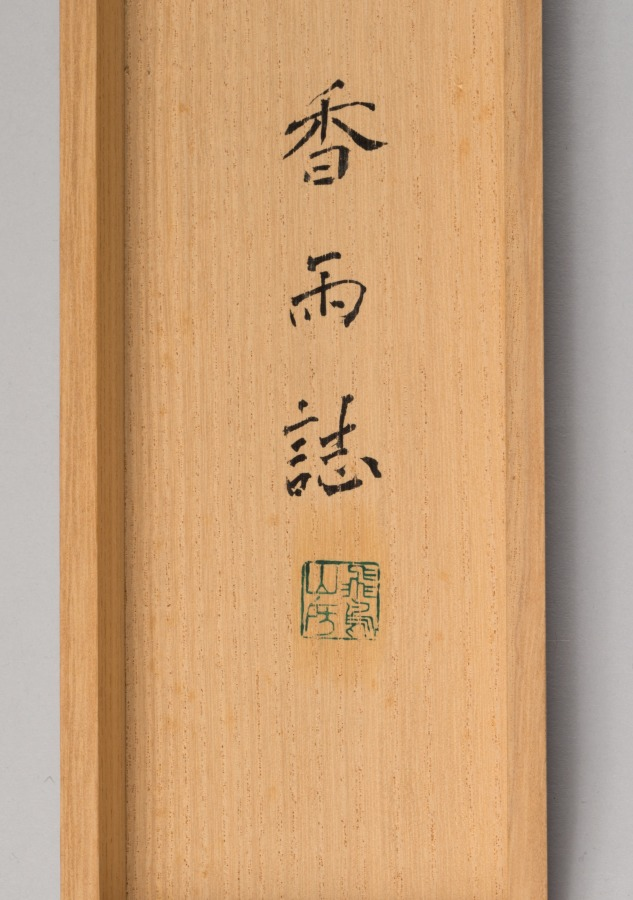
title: Summer Flowers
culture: Japan, Edo period (1615–1868)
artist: Kitagawa Sōsetsu (Japanese, active 1639–50)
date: mid-1600s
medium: hanging scroll; ink, color, and gold on paper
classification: Painting